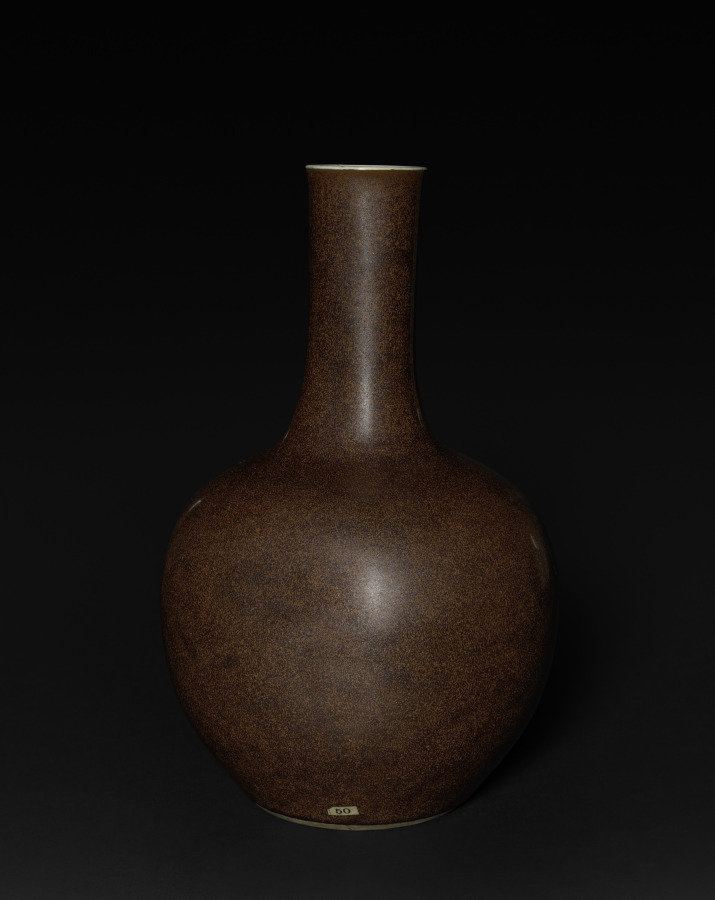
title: Vase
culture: China, Qing dynasty (1644–1911), Qianlong reign (1736–95)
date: 1736–95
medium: porcelain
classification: Ceramic